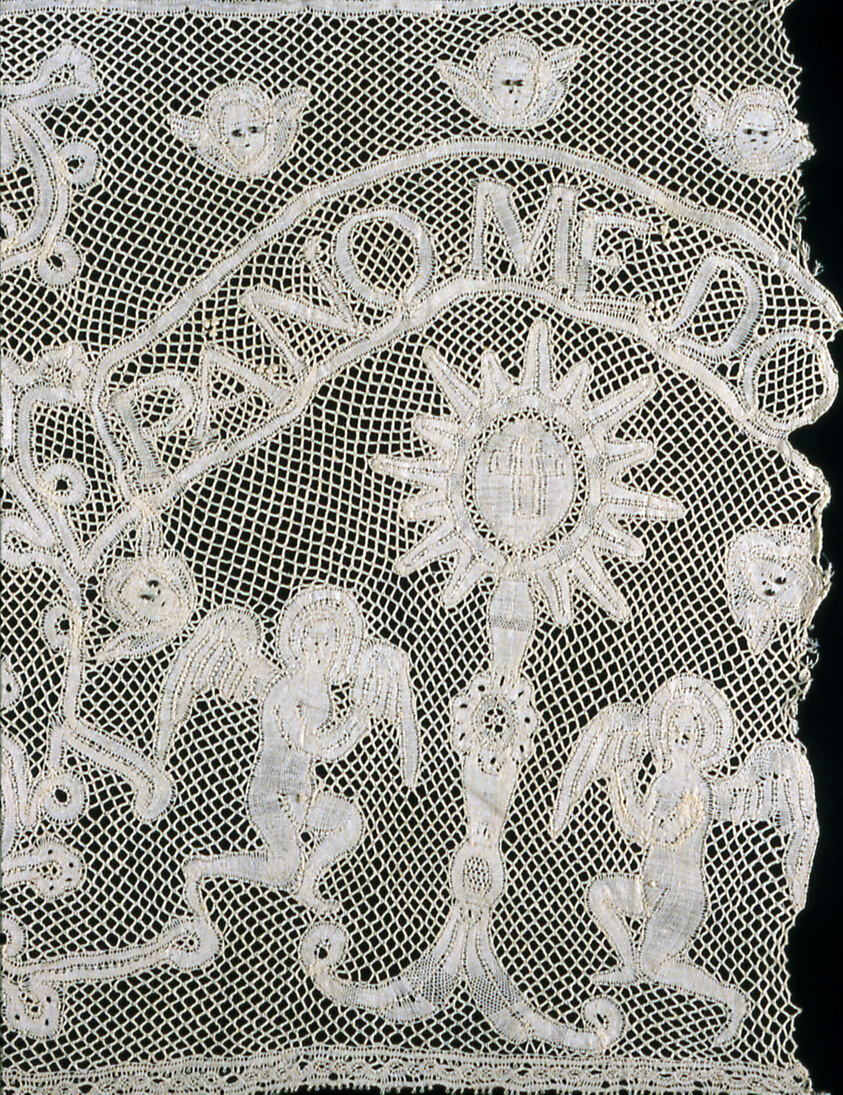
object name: Textile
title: Border (From an Altar Cloth)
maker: Italy, Milan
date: 1725/75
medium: Linen, bobbin part lace; embellished with glass beads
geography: Milan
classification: textile; lace - bobbin